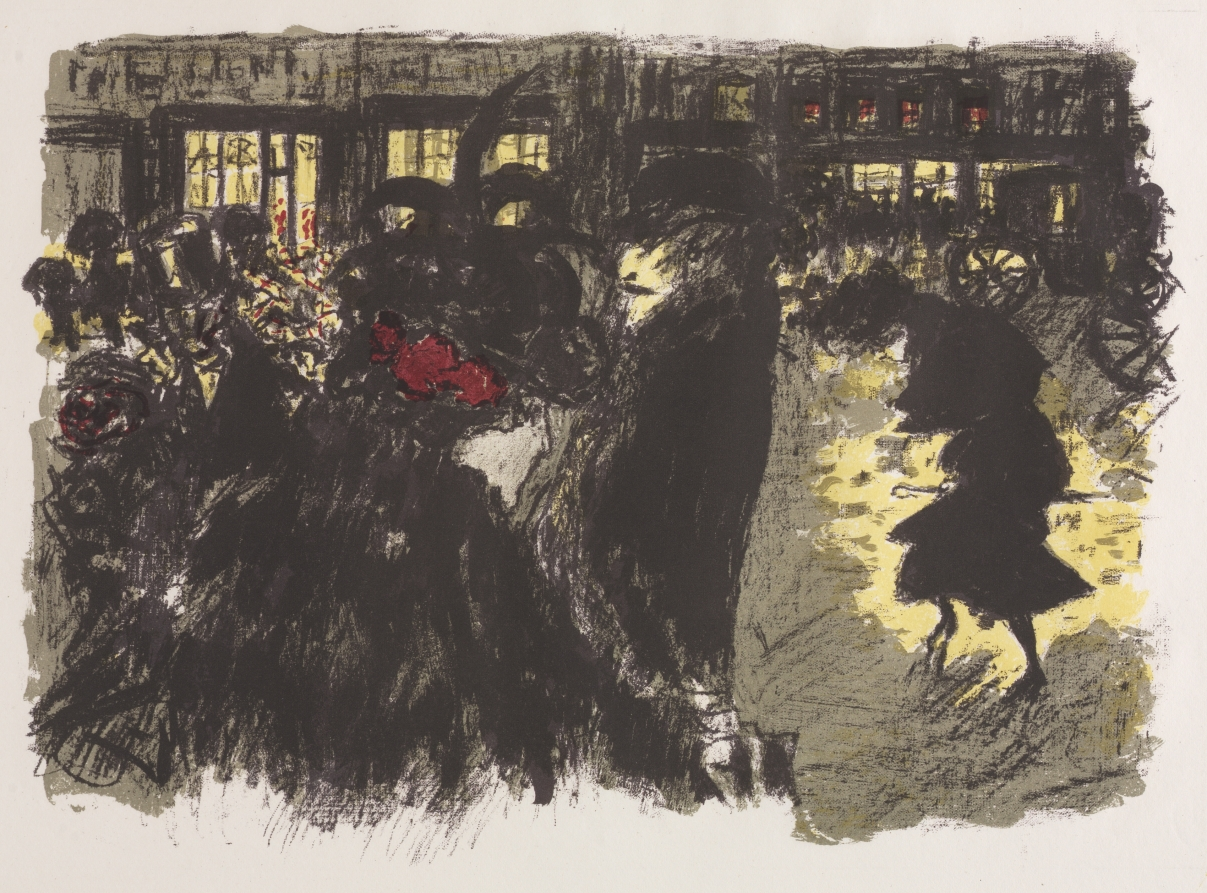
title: The Square at Evening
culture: France, 19th century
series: Some Scenes of Parisian Life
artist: Pierre Bonnard (French, 1867–1947)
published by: Published by Ambroise Vollard; Printed by Auguste Clot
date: 1899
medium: lithograph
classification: Print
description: By the mid-19th century lithography was used primarily for commercial purposes, but was revived as a creative artistic medium by the success of color printing. The growing popularity of posters by artists such as Jules Cheret (1836-1932) and Henri de Toulouse-Lautrec contributed to a renewed interest in color lithography at the end of the century. In addition, zinc plates, which are lighter, cheaper, and more flexible than traditional lithographic stones, had been perfected. There was also the influence of Japanese color woodblock prints and the formation of artist's organizations, like the Société des artistes lithographes Français (Society of French Lithographic Artists) and the Société de l'estampe originale (Society of the Original Print), to stimulate printmaking. By the 1890s a proliferation of fine printers, dealers, independent exhibitions, publications devoted to original prints, critics, and publishers all supported color lithography, which flourished in France as the favored printmaking medium of avant-garde artists.